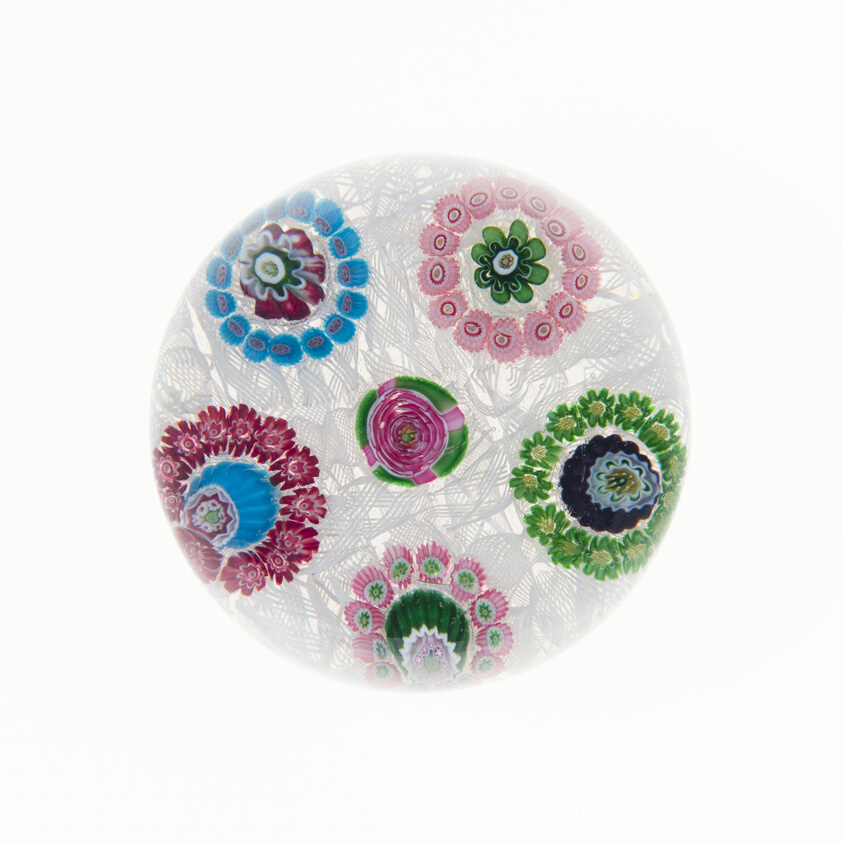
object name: Glass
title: Paperweight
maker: Clichy Glassworks (Cristalleries de Clichy); Clichy, France, 1837-1885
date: 19th century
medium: Glass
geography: Clichy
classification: paperweight; lampwork; european decorative arts; glass